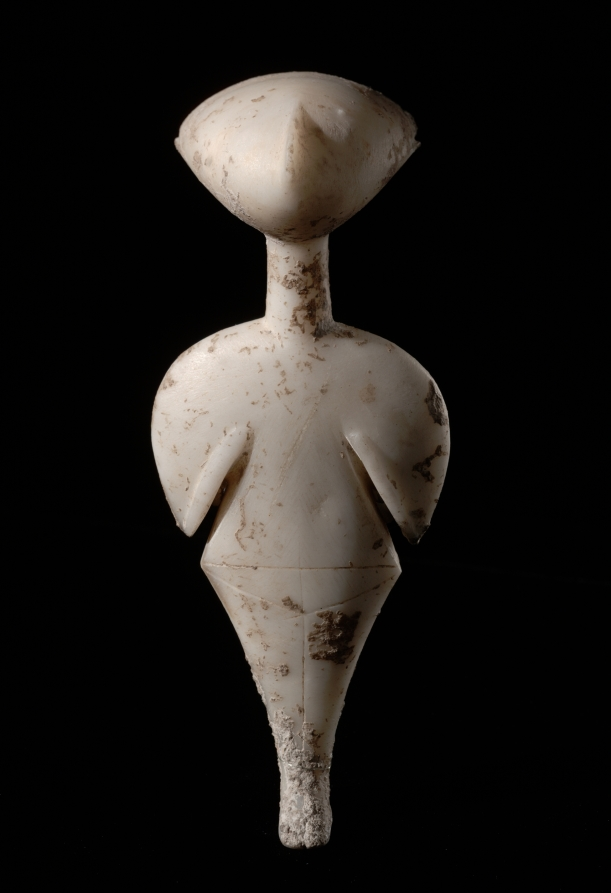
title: Statuette of a Woman: "The Stargazer"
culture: Western Anatolia, early Bronze Age (c. 3300–1200 BCE)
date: c. 3000 BCE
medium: marble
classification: Sculpture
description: "The Stargazer" moniker was given to this diminutive marble sculpture because its upturned head looks toward the heavens. Details carved into the stone are visible while painted features have been lost to time. We do not know how this object was used, but its enigmatic nature invites speculation.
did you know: We can identify this mysterious figure as female by the inscribed pubic triangle below her waist.